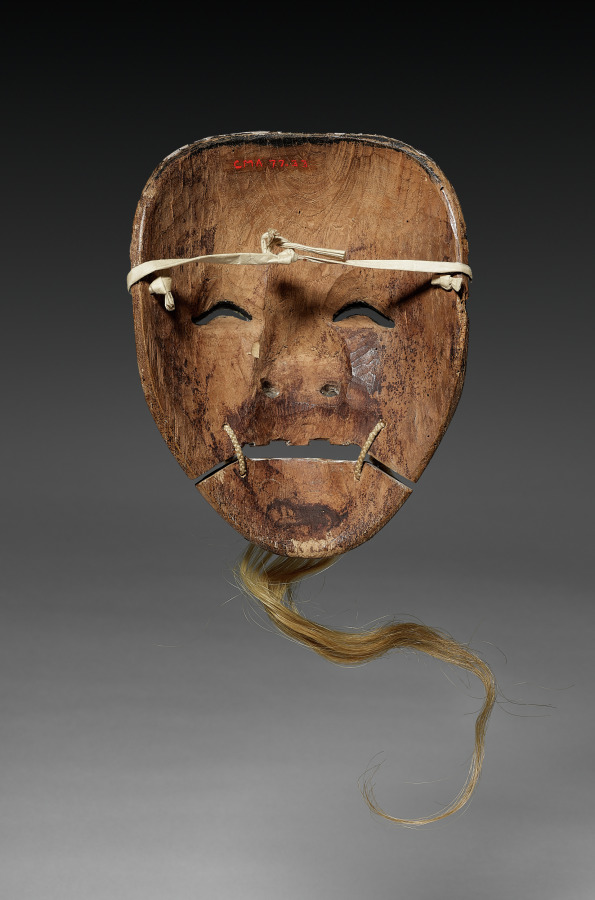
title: Noh Mask of Okina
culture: Japan, Muromachi period (1392–1573)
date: 1400s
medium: polychromed wood and hemp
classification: Sculpture